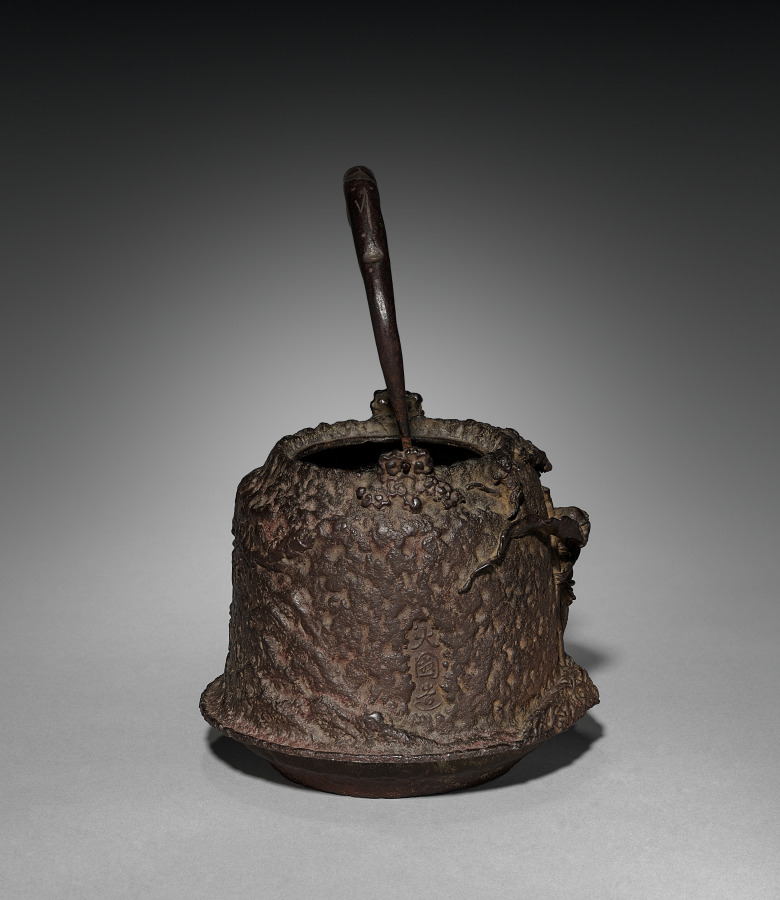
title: Covered Tea Kettle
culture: Japan, Edo period (1615–1868)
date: 1615–1868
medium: iron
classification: Metalwork